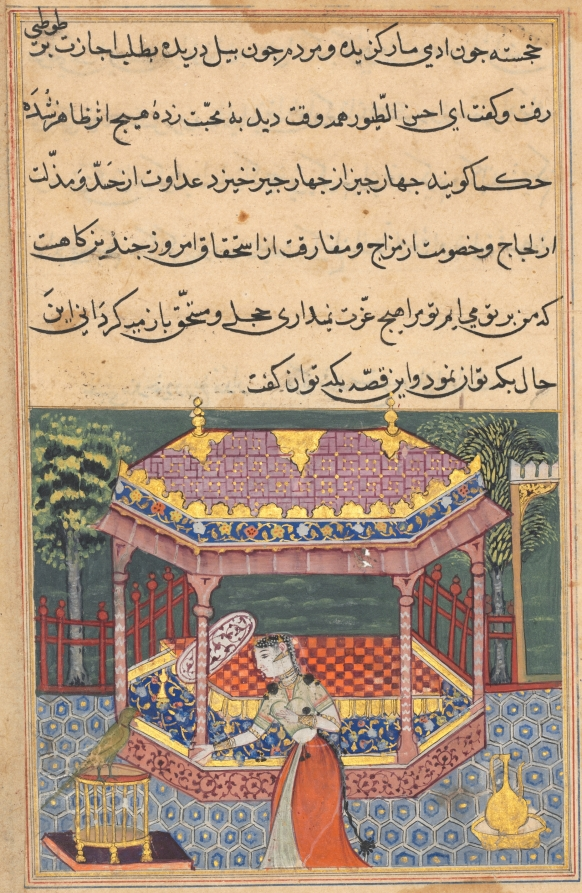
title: The parrot addresses Khujasta at the beginning of the thirty-seventh night, from a Tuti-nama (Tales of a Parrot)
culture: Mughal India, court of Akbar (reigned 1556–1605)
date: c. 1560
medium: gum tempera, ink, and gold on paper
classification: Painting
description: As the sun sets on the thirty-seventh of fifty-two nights, Khujasta speaks with Tuti the talking parrot. The parrot begins to tell her a tale about the son of the Emir of Sistan, who became the servant of a snake. The story conveys a moral about the importance of companionship and devotion.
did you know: Along with the parrot’s cage, Khujasta’s terrace pavilion contains a ewer and basin used for ablutions.